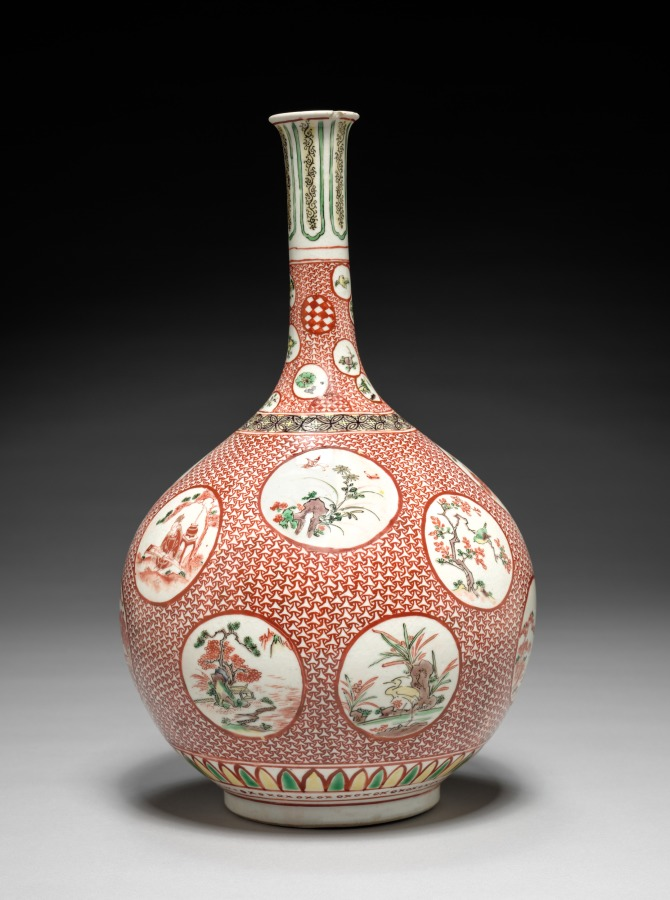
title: Vase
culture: Japan, Edo period (1615–1868)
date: late 1600s-early 1700s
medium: porcelain with decoration in colored enamels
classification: Ceramic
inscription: character "Fuku" (well-being) on base in black with green overglaze.